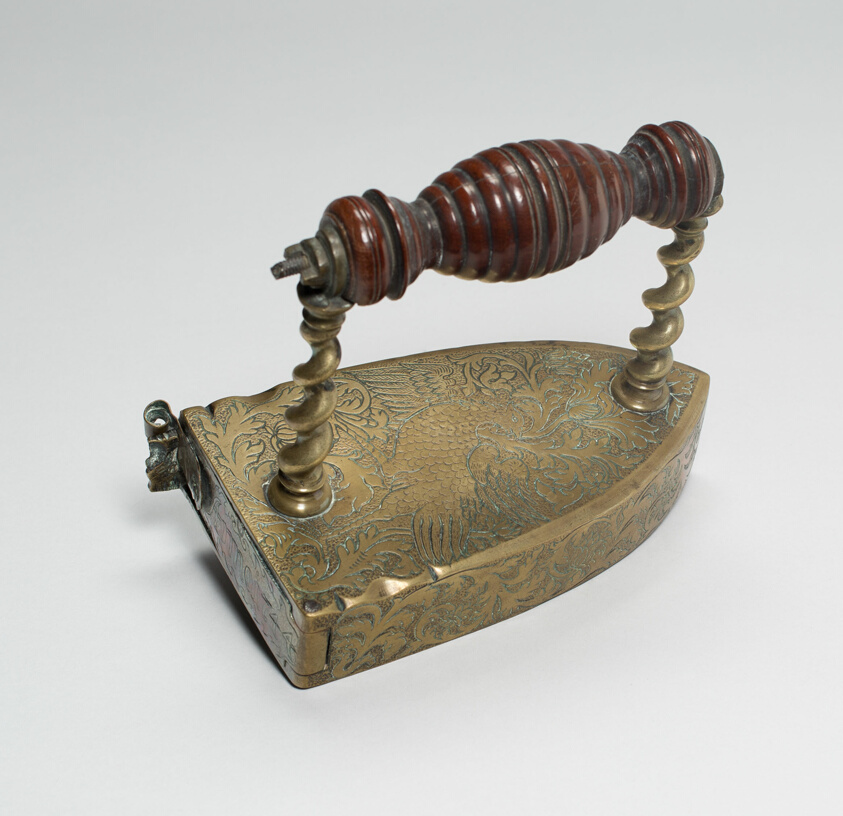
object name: Metalwork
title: Sad Iron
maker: Netherlands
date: 1744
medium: Brass and wood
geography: Netherlands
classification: tool; european decorative arts; metalwork